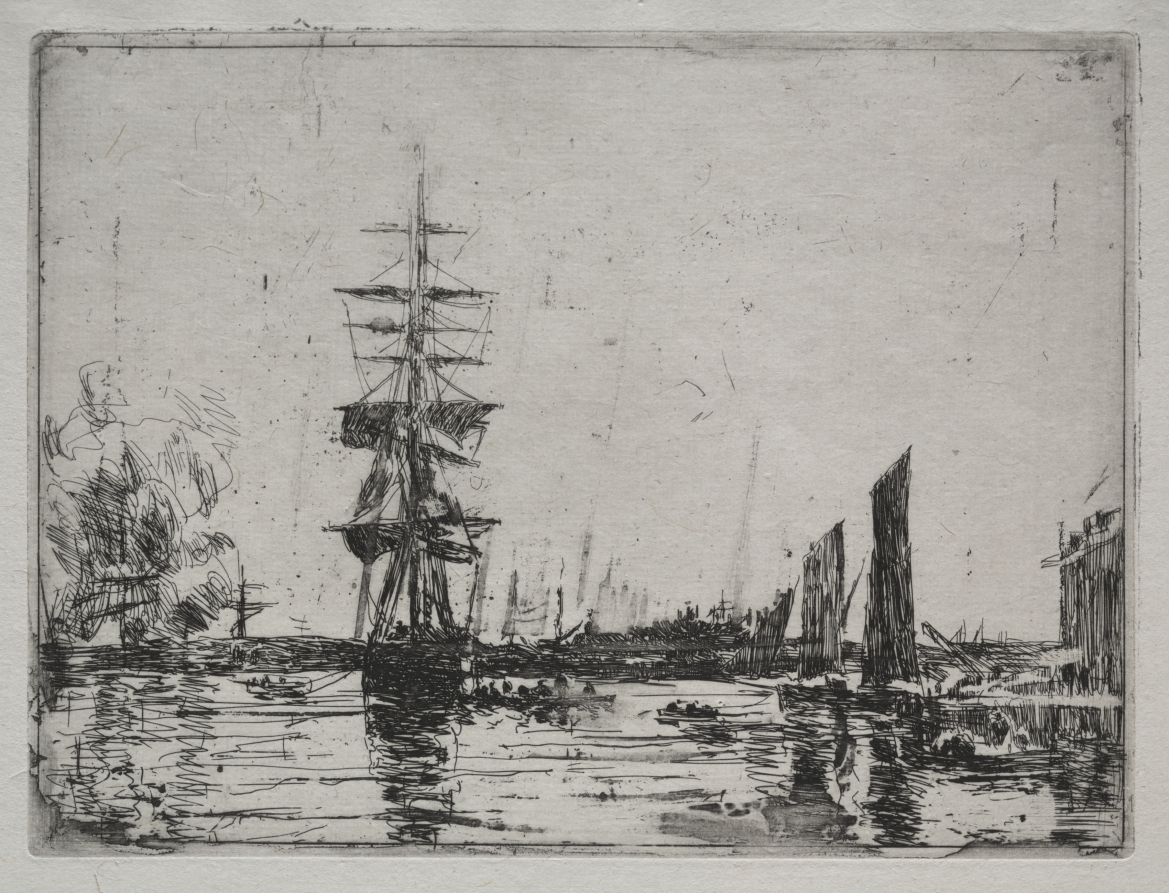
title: Boats at Anchor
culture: France, 19th century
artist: Eugène Boudin (French, 1824–1898)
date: late 1800s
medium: etching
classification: Print